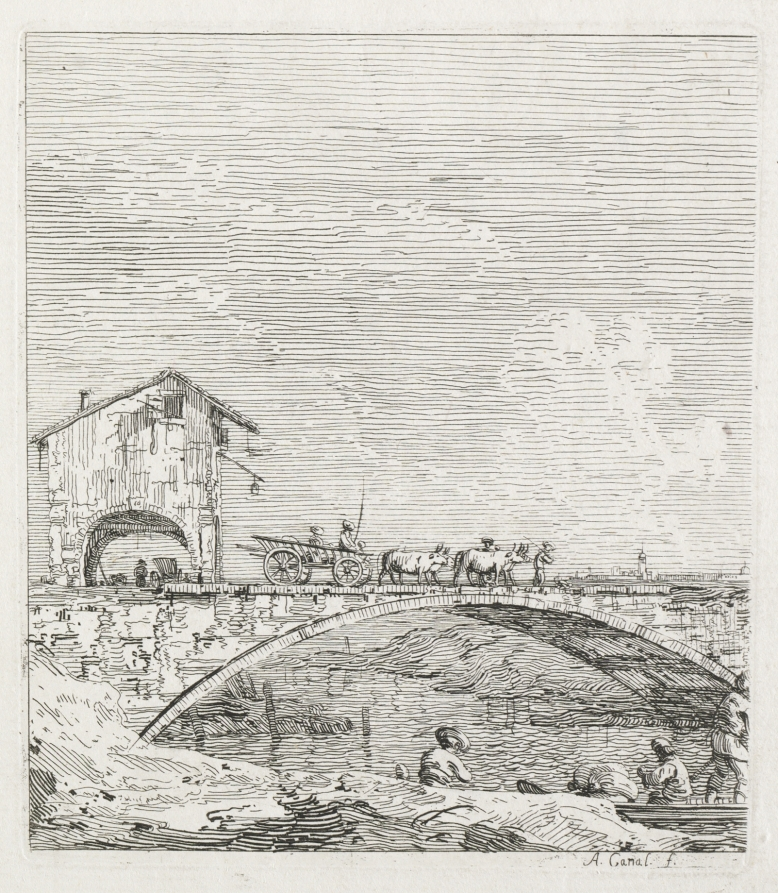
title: Views: A Wagon Passing over a Bridge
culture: Italy, Venice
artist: Antonio Canaletto (Italian, 1697–1768)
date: 1735–1746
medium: etching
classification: Print